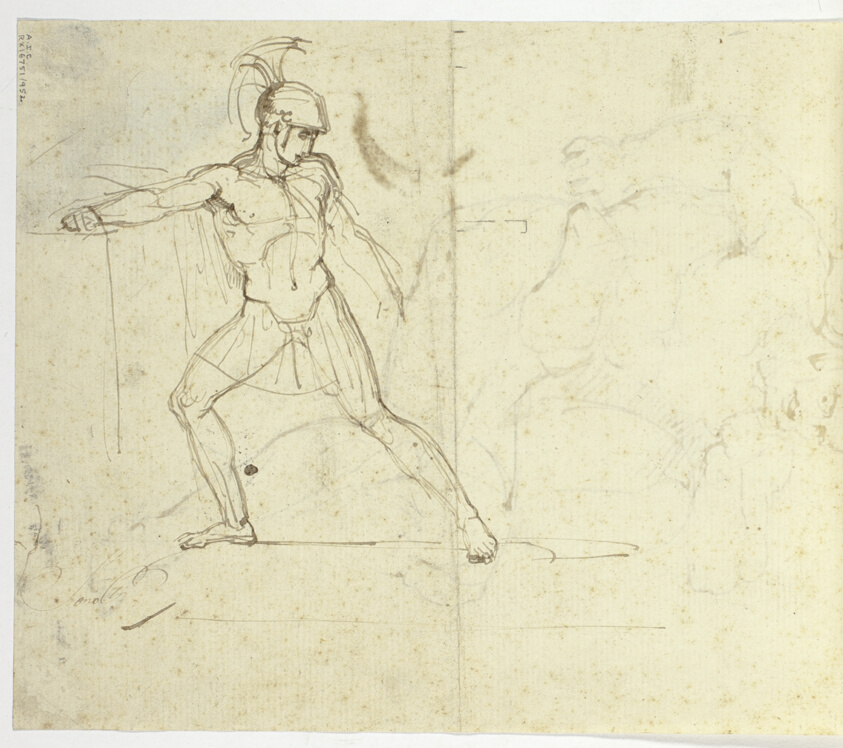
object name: Drawing and Watercolor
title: Seated Warrior (recto); Striding Warrior (verso)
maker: Follower of Henry Fuseli; Swiss, 1741-1825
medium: Pen and brown ink on ivory laid paper (recto and verso), tipped onto cream wove paper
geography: United Kingdom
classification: pen and ink drawings; drawings (visual works); prints and drawing